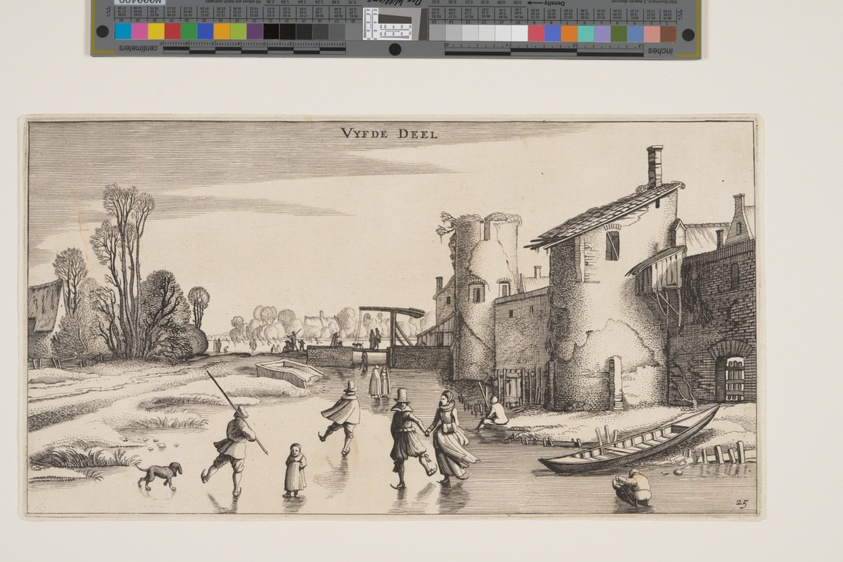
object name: Print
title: Winter Landscape with Skaters Along a Town-Wall, from Landscapes (Playsante Lantschappen)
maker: Attributed to Claes Jansz. Visscher II (Dutch, 1586-1652); after Jan van de Velde II (Dutch, c. 1593-1641)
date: c. 1641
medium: Etching, with engraving, on ivory laid paper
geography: Netherlands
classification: etching; paper; print; prints and drawing